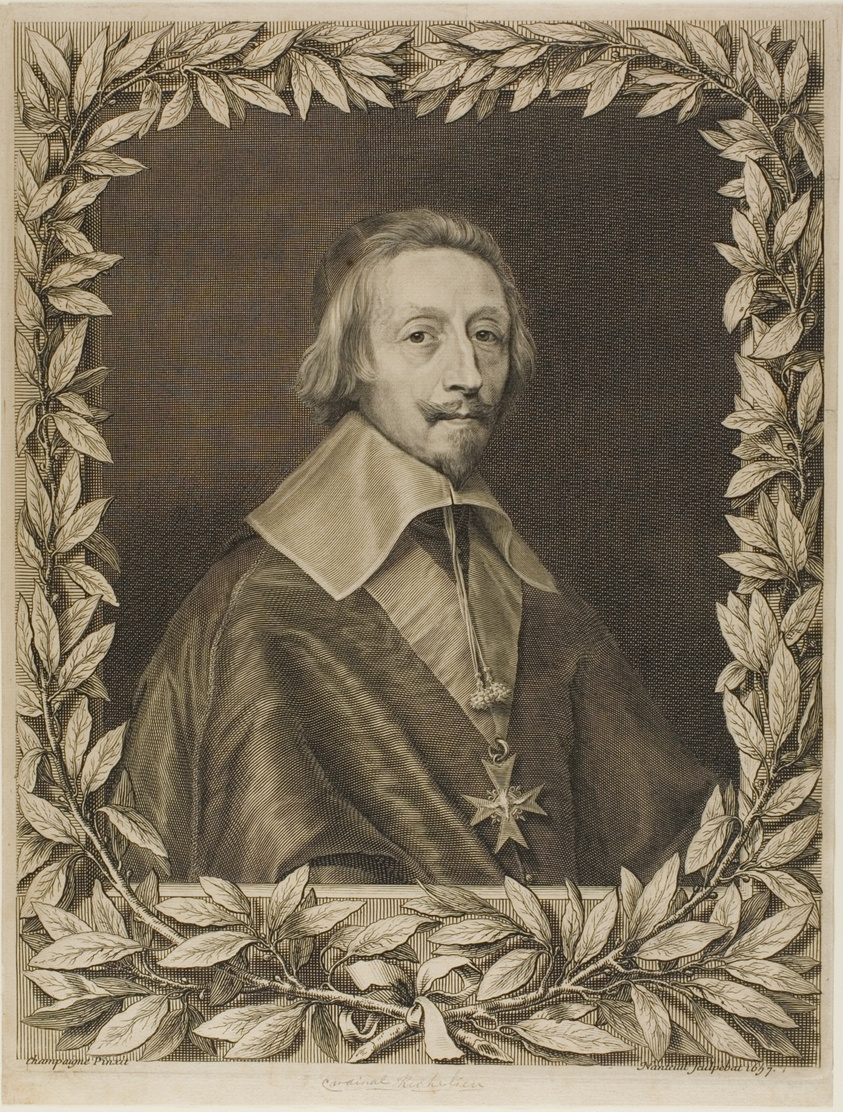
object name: Print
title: Cardinal Richelieu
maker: Robert Nanteuil (French, 1623-1678)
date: 1657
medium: Engraving on paper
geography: France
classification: engraving; print; prints and drawing